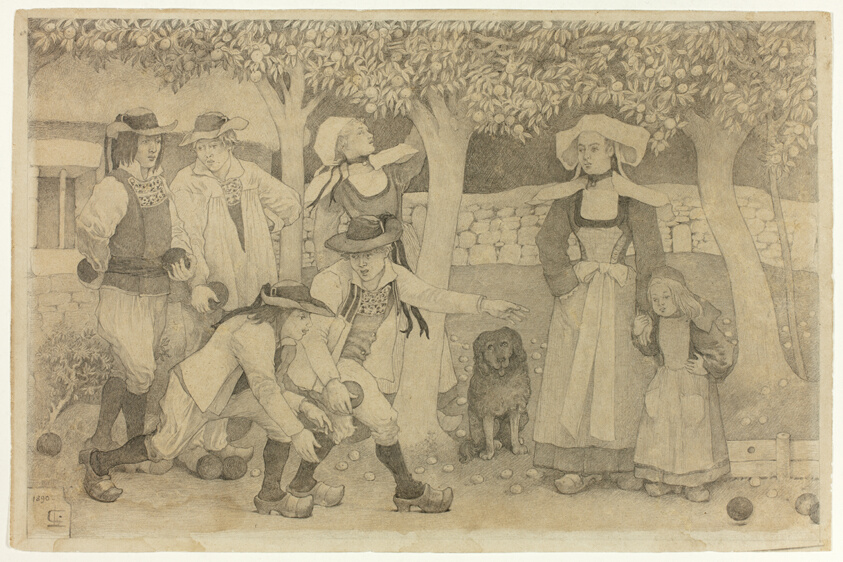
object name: Drawing and Watercolor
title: Petanque Players in Brittany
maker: Charles Laval (French, 1862-1894)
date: 1890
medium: Graphite on cream wove paper, laid down on off-white wove paper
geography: France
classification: prints and drawing; drawings (visual works)